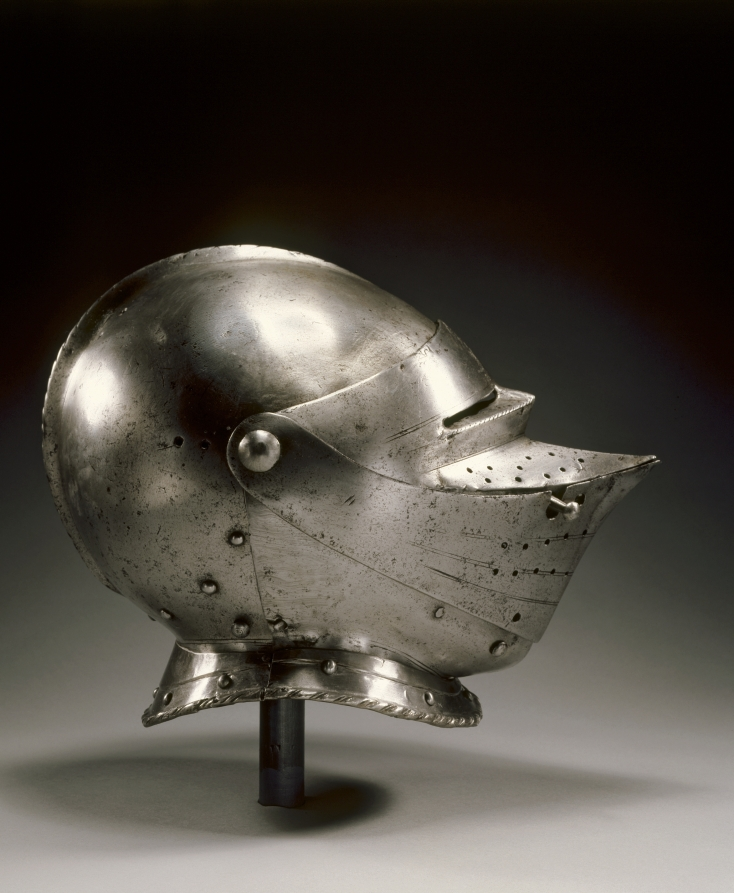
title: Close Helmet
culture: Germany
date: c. 1510–30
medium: steel with black paint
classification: Arms and Armor